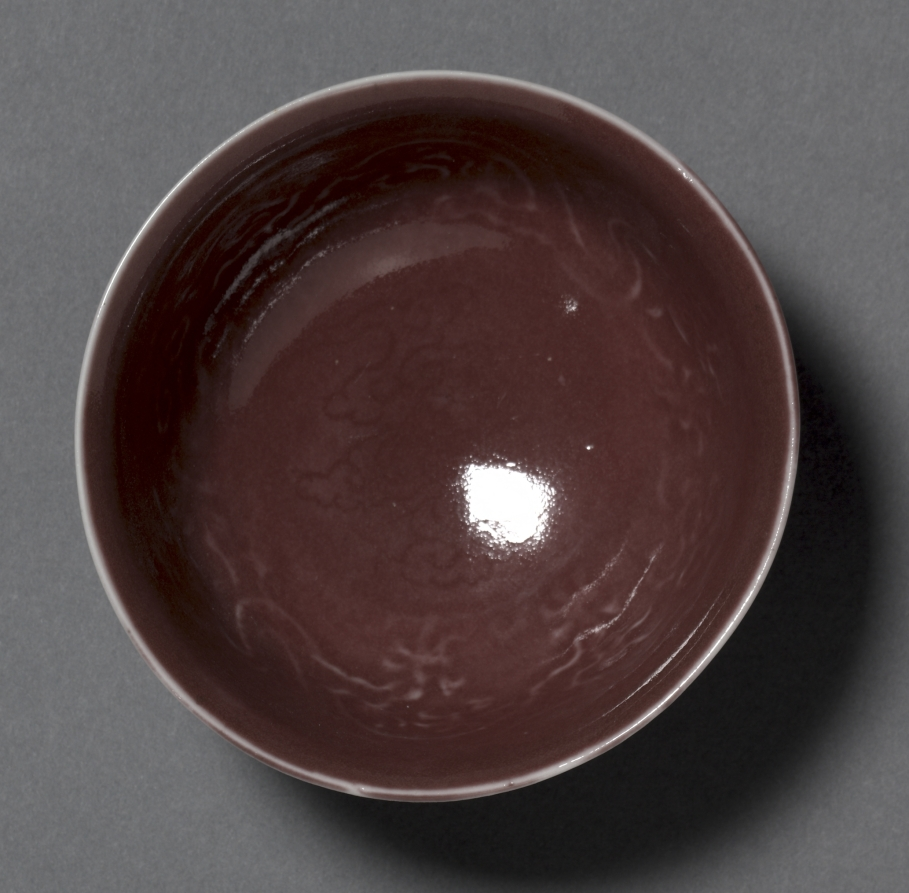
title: Bowl with Dragons and Clouds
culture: China, Jiangxi province, Jingdezhen, Ming dynasty (1368-1644), Hongwu period (1368-98)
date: 1368–98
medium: porcelain with molded and incised decoration and copper-red glaze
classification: Ceramic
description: Fragments of bowls with unglazed foot rings and molded and incised ornament very similar to this extremely rare piece have been excavated at the early Ming dynasty site of the Hongwu palace at Nanjing.